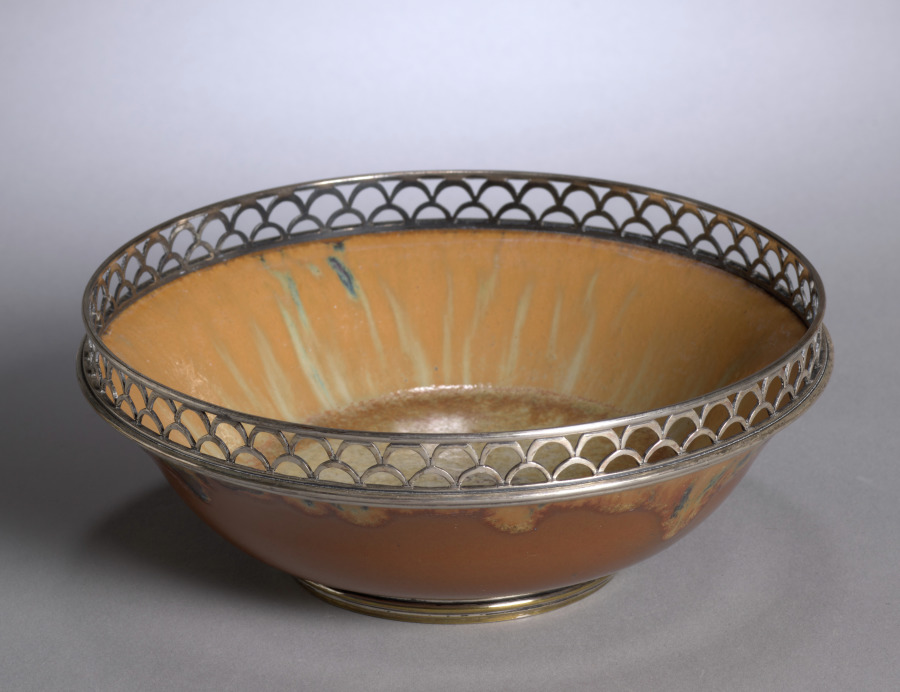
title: Bowl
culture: France, late 19th-early 20th Century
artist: Auguste Delaherche (French, 1857–1940)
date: c. 1899–1900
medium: stoneware with metal mounts, silvered and gilded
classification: Ceramic